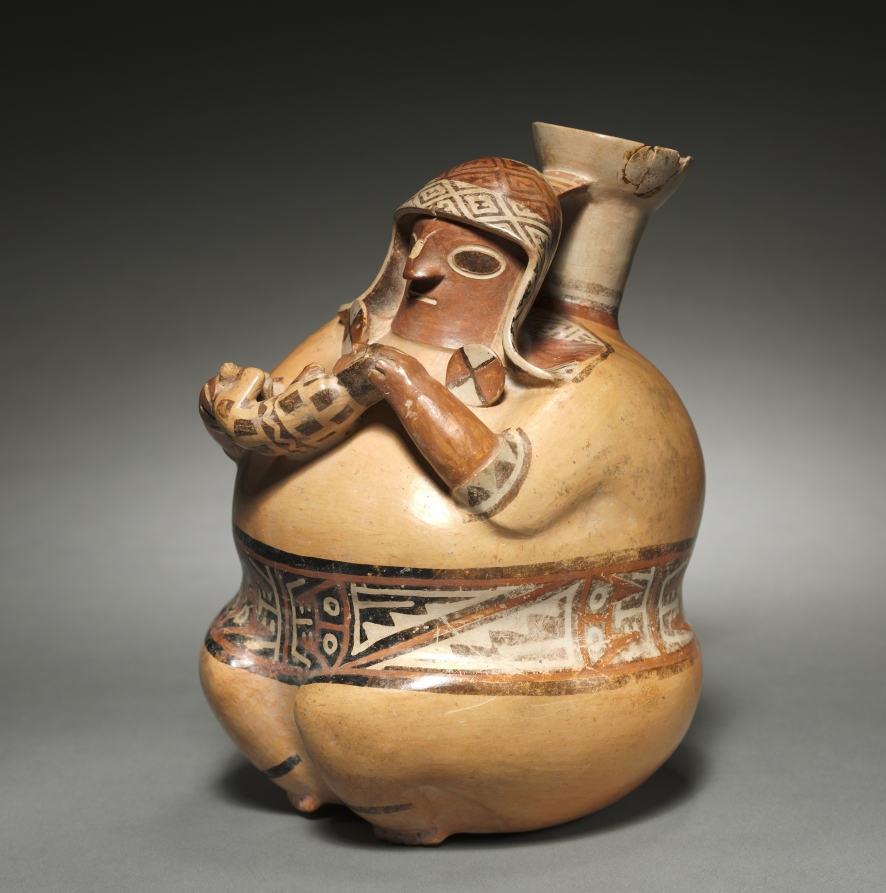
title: Mother-and-Child? Vessel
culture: Central Andes, North Highlands, Recuay people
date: 1–700 CE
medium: ceramic, slip, pigment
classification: Sculpture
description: Well-dressed, important women like this one are depicted fairly often in Recuay art. These women hold a variety of things, ranging from cups that may refer to feasts held on important political occasions to small figures commonly interpreted as children, as here. These and other representations have led scholars to suggest that Recuay women held authority independent of their male partners; their authority may have stemmed in part from involvement in feasting celebrations.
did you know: Recuay ceramics typically use only three colors: black, white, and red.